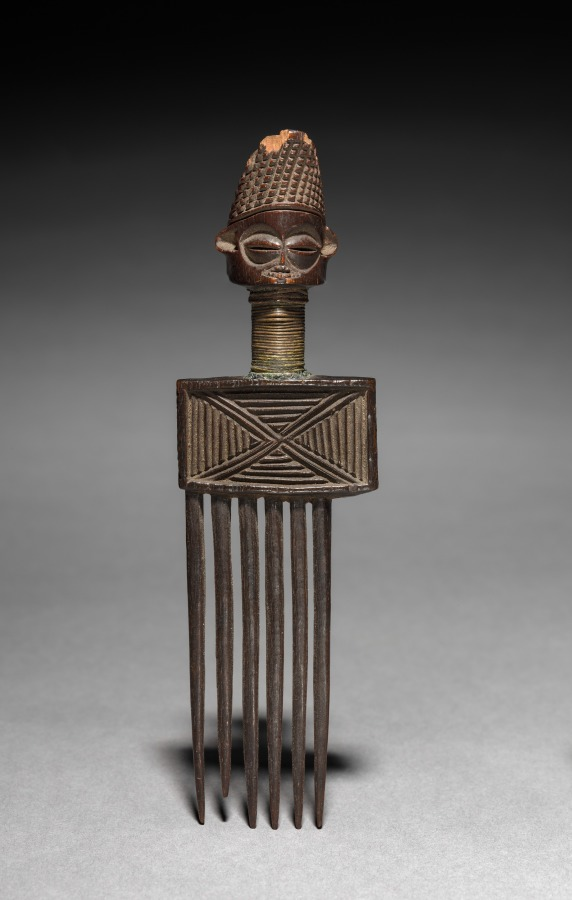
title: Comb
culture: Africa, Central Africa, Democratic Republic of Congo, Luba-style maker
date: c. 1900s?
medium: Wood and wire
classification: Tool